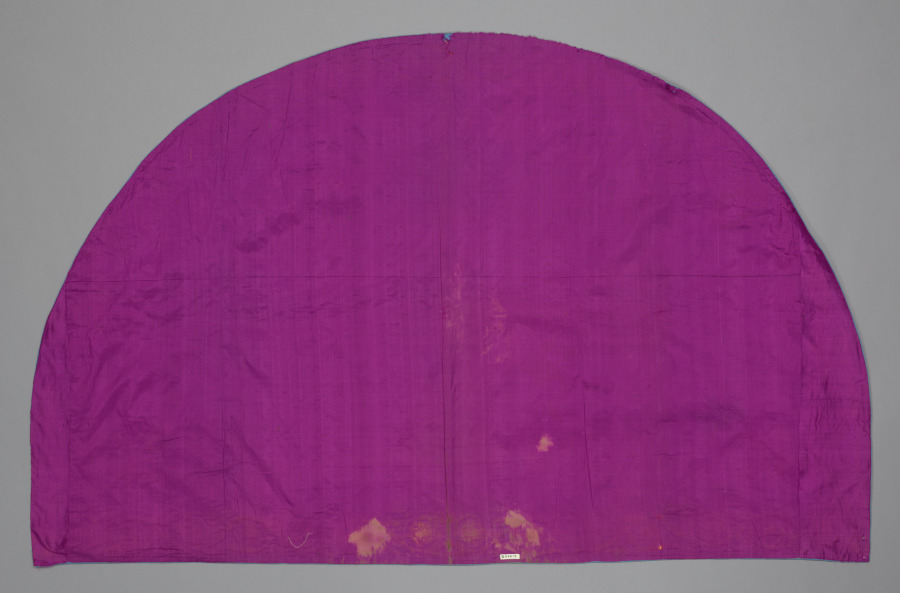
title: Woman's Costume (Head Square)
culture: Italy, Sicily, 19th century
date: 1800s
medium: silk (blue) with metal thread embroidery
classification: Garment